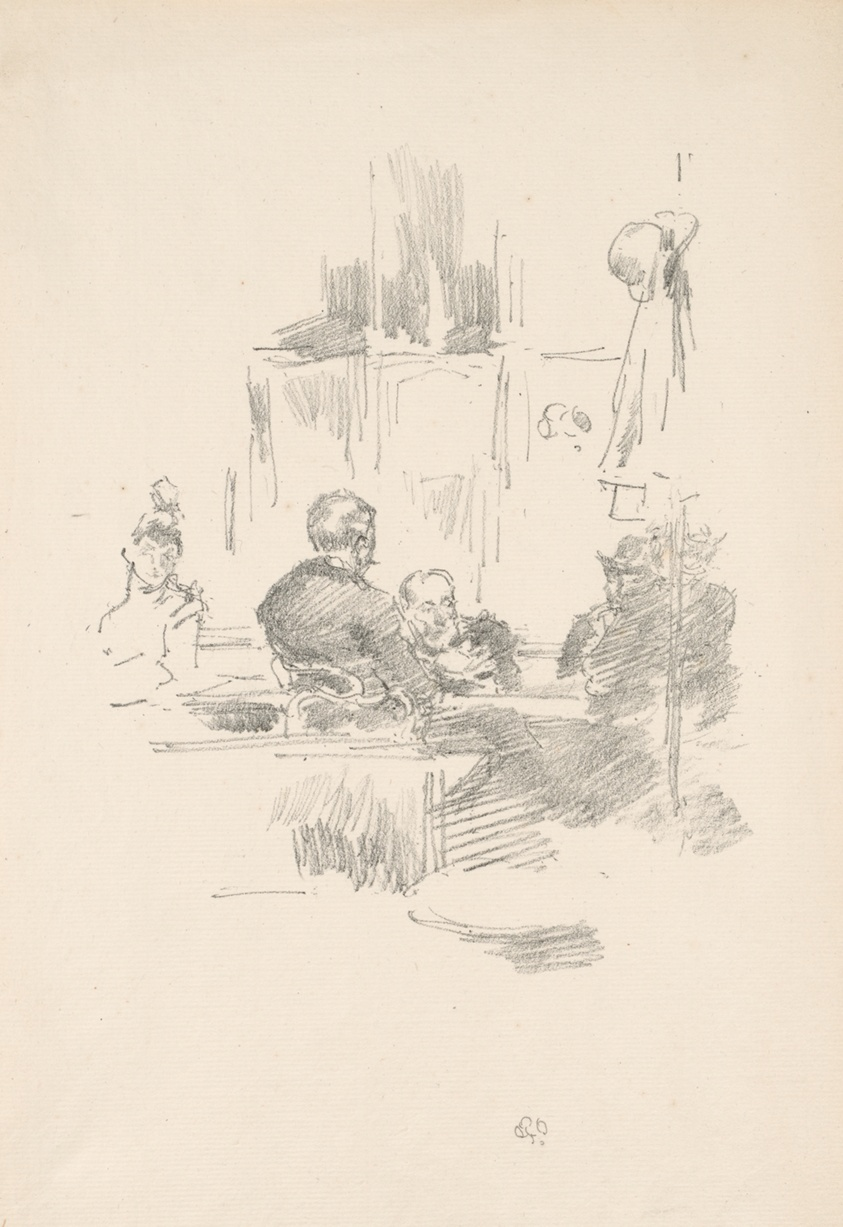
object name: Print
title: Late Picquet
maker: James McNeill Whistler (American, 1834-1903)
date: 1894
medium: Transfer lithograph in black on ivory laid paper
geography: United States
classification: transfer lithograph; lithograph; print; prints and drawing; paper